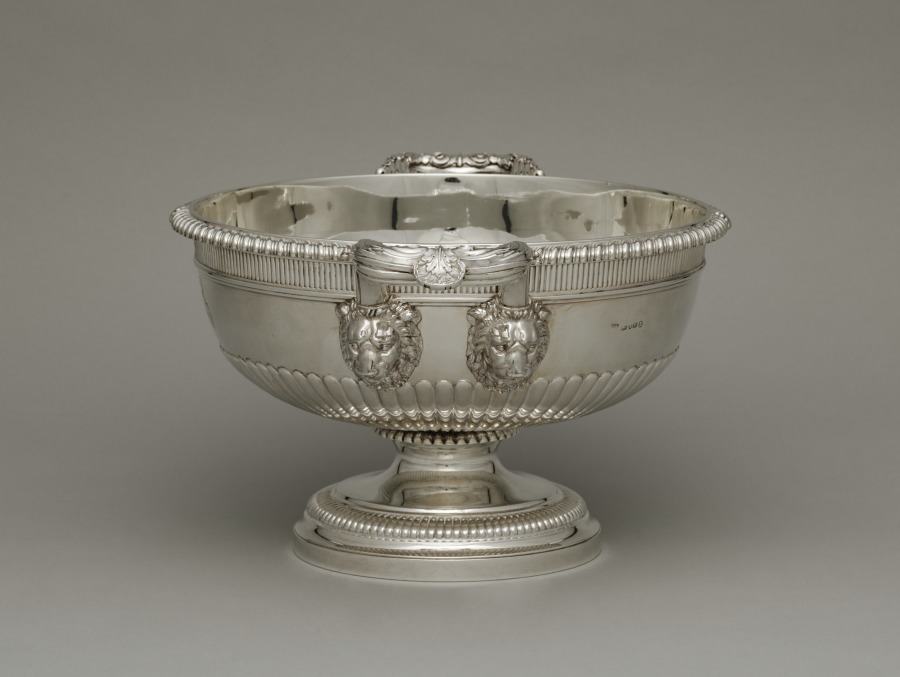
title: Tureen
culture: England, London, 19th century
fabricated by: Paul Storr (British, 1771–1844)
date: 1812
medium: silver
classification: Silver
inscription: coat of arms: Hutton impaling Chaytor; crest: Hutton. (Arms of Timothy Hutton (1729-1864) of Marske and Clifton Castle, Yorkshire, and his wife Elizabeth Chaytor of Spennithorne Hall, who were married in 1804.)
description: Silver fulfilled a prominent role in projecting wealth, status, power, and ritual in British life during the 1600s and 1700s. Elaborate forms such as this tureen, with its acanthus leaves and fluted detailing, not only represented wealth in its sheer silver weight but also provided royal and aristocratic owners a surface for displaying engraved coats of arms. The arms of the High Sheriff of Yorkshire, Timothy Hutton and his wife Elizabeth Chaytor of Spennithorne Hall in northern England are engraved on this tureen by Paul Storr, one of the most prominent London silversmiths of the period.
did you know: This tureen is accompanied by a cover and stand. See cover record.